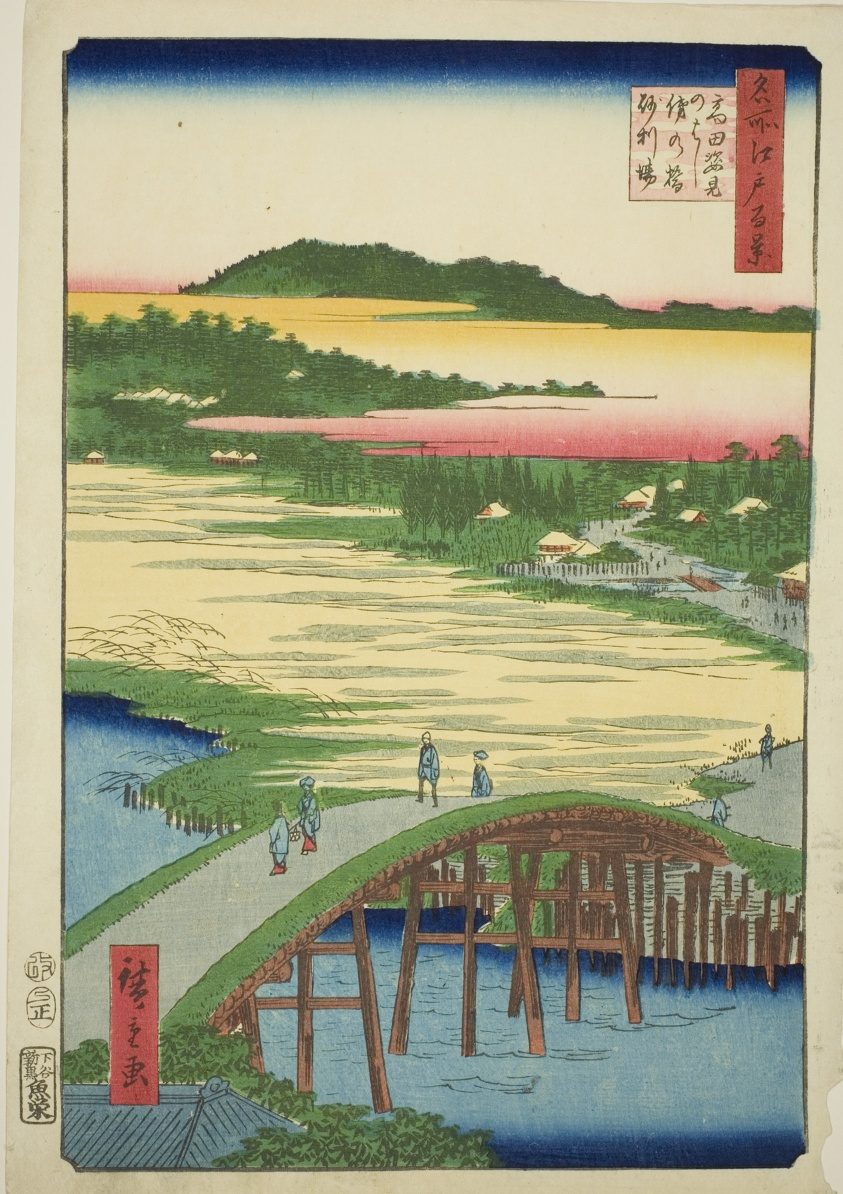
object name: Print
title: Sugatami Bridge, Omokage Bridge and the Gravel Pit at Takata (Takata Sugataminohashi Omokagenohashi jariba), from the series "One Hundred Famous Views of Edo (Meisho Edo hyakkei)"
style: Japanese (culture or style)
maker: Utagawa Hiroshige 歌川 広重; Japanese, 1797-1858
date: 1857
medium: Color woodblock print; oban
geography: Japan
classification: woodblock print; print; asian art